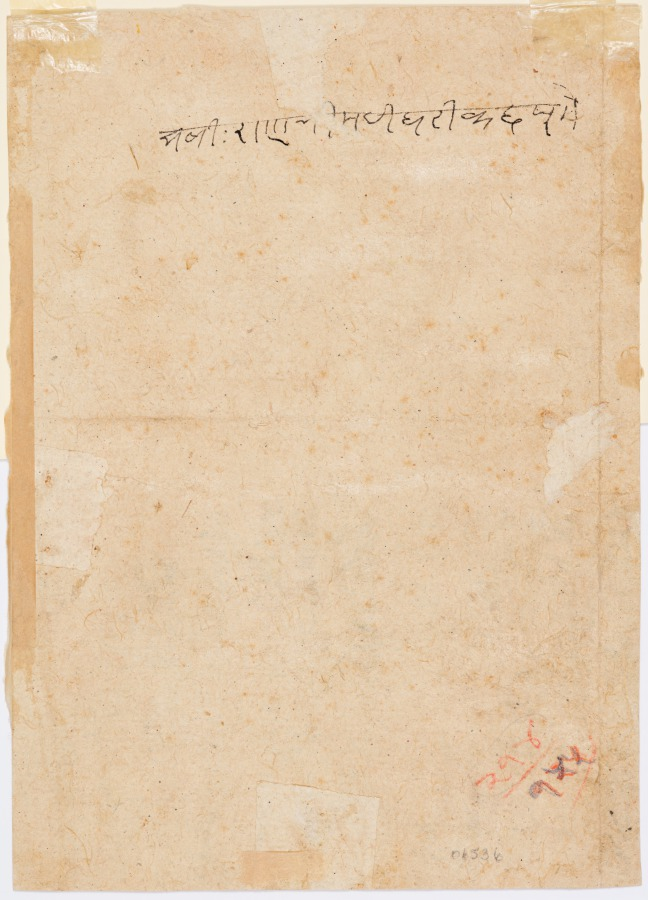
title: Maharana Bhim Singh of Mewar (r. 1778–1828) with a Consort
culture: Northwestern India, Rajasthan, Rajput Kingdom of Mewar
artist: attributed to Chokha (Indian, active c. 1799–1824)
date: c. 1810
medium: Gum tempera, silver and gold on paper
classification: Painting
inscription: mhārānā jī śrī bhīma sīṃgha jī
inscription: sakhī rānā bhīma siṃgha rī kachajhu mei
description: The consort folds her hands in devotion to the Maharana whose glory is highlighted with a halo behind his head. The Maharana fondly holds the chin of his paramour and appears to be in the process of putting a garland around her neck. One of the most celebrated artists in the history of painting at Mewar, Chokha has nestled the couple in an overabundance of bolsters, their chamber covered with pink flower petals and draped with yellow garlands.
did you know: A European-style armchair in the background is a reminder of British influence at the court.